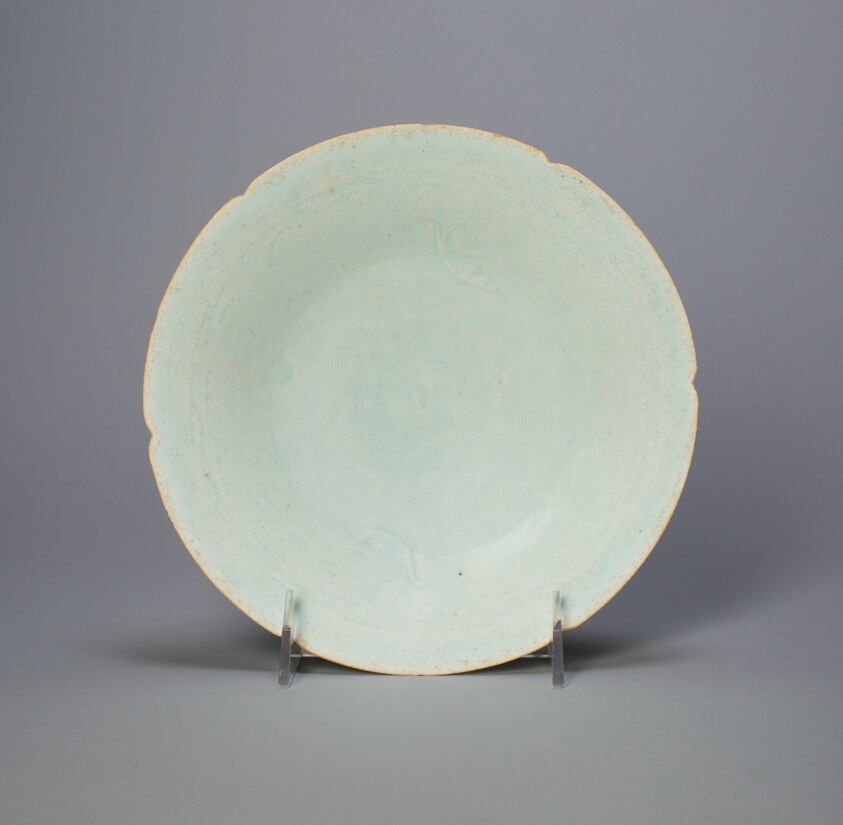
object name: Vessel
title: Foliate Bowl with Fish and Waves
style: Chinese (culture or style)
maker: China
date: Northern Song dynasty (960–1127), 12th century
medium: Qingbai ware; porcelain with underglaze incised decoration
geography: China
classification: bowl; porcelain; dish (vessel); asian art; ceramics; vessel